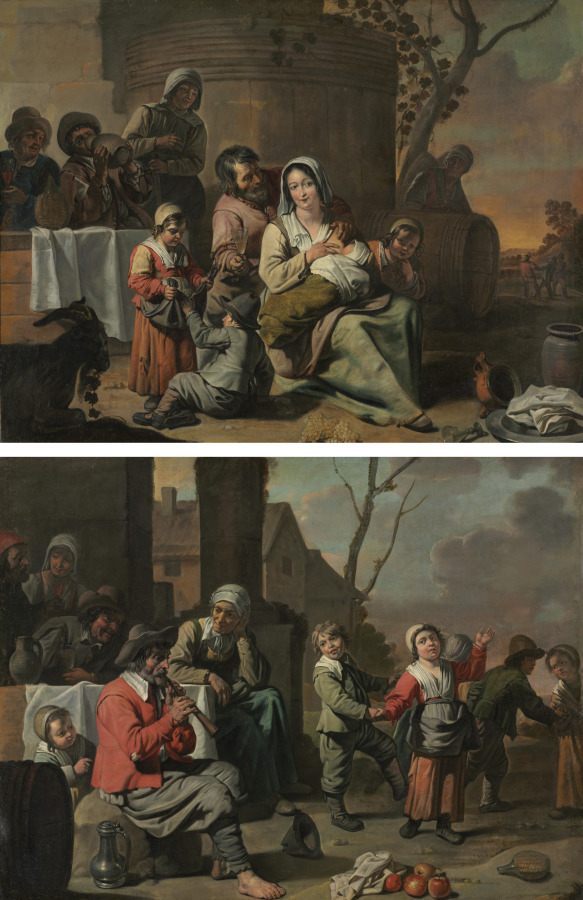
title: Vintage Scene and Peasant Children Dancing (painting pair)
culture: France, 17th century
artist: circle of Le Nain (French)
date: 1650s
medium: oil on canvas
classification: Painting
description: The mid-17th century saw revived interest in representations of the lower classes. Artists like the Le Nain brothers in France painted scenes that looked back to the Renaissance tradition of pastoral imagery. The Le Nain often depicted ordinary country folk going about their daily business, subjects and figures they remembered from their childhood in rural Laon. Considered a companion piece to Peasant Children Dancing (1958.175.2), Vintage Scene has also been attributed to the Master of the Béguins, a Flemish artist who worked in the manner of the Le Nain in Paris. Here, good-natured though bawdy males drink in the background shade, while at center a sweet-faced young woman surrounded by chubby children flashes the viewer a coy smile that reveals her awareness of the slowly creeping hand of her drunk companion. While peasants drinking was a popular subject among Flemish artists, the theme of wine connects the subject with the grape harvest, which recalls the Le Nain's agricultural homeland in France. This use of both aesthetic and biographical aspects of the Le Nain's lives demonstrates the Master of Béguins' ability to absorb the stylistic and thematic lessons of the famous brothers.